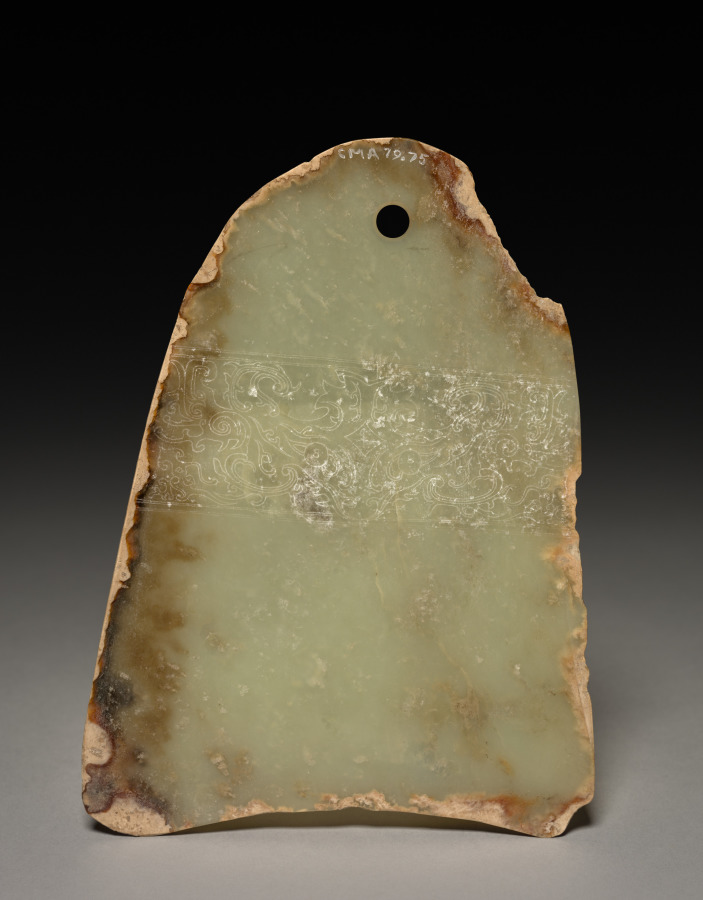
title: Blade Incised with Animal Masks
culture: China, Song dynasty (960-1279)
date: 960– 1279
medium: jade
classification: Jade